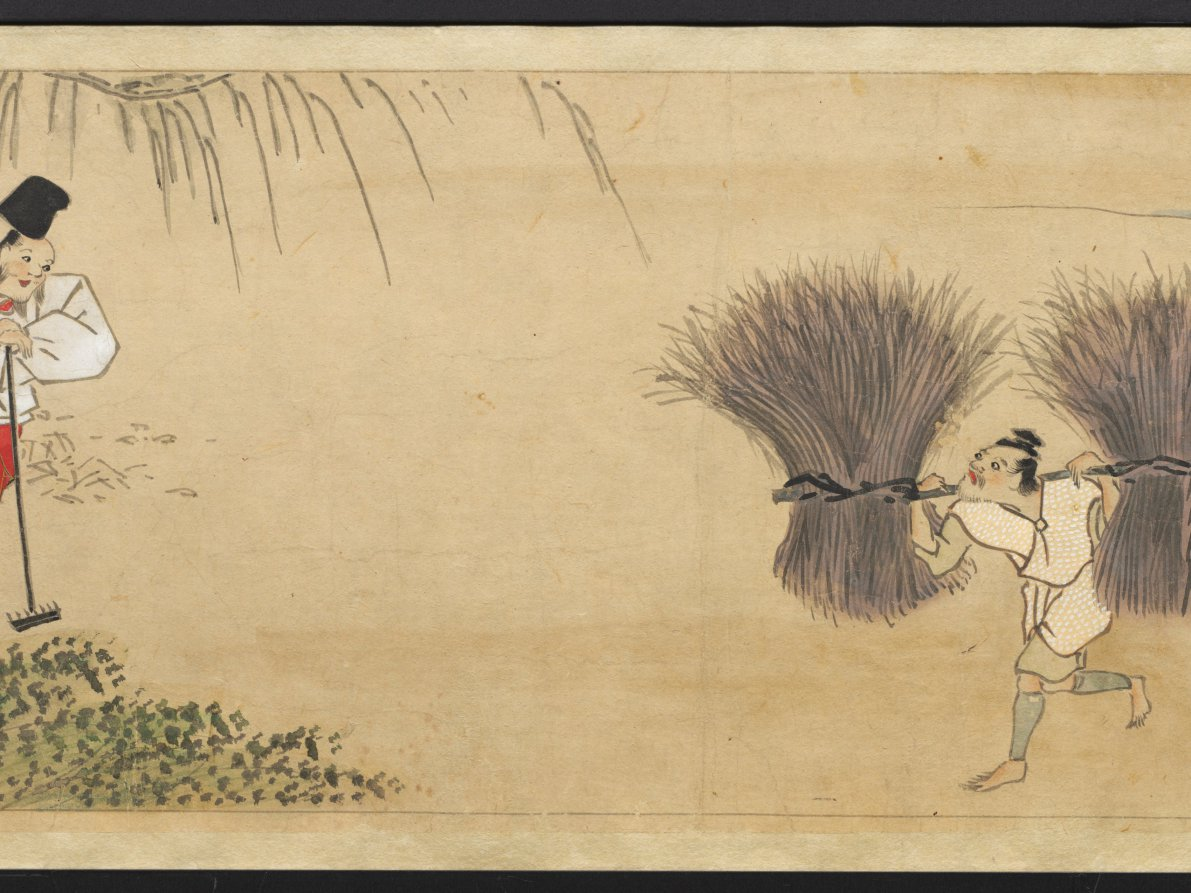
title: The Saltmaker's Story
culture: Japan, Edo period (1615–1868)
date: early 1600s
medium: One of a pair of handscrolls; ink, color, and gold on paper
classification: Painting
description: Once read and copied by girls at New Year’s celebrations and included in dowries, The Saltmaker’s Story is a rags-to-riches tale in which daughters are gifts from the gods. Despite his simple outlook, the main character progresses from humble roots as an associate at Kashima Shrine to the elite status of grandfather of the emperor through the intervention of the Kashima deity. The Saltmaker’s Story is traditionally presented in a set of three scrolls, but the text of this set has been removed by a previous owner, who remounted the illustrations as a pair. The paintings of this one take us from right to left through the first half of the tale.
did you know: This handscroll originally had texts before its paintings, but the texts were removed.